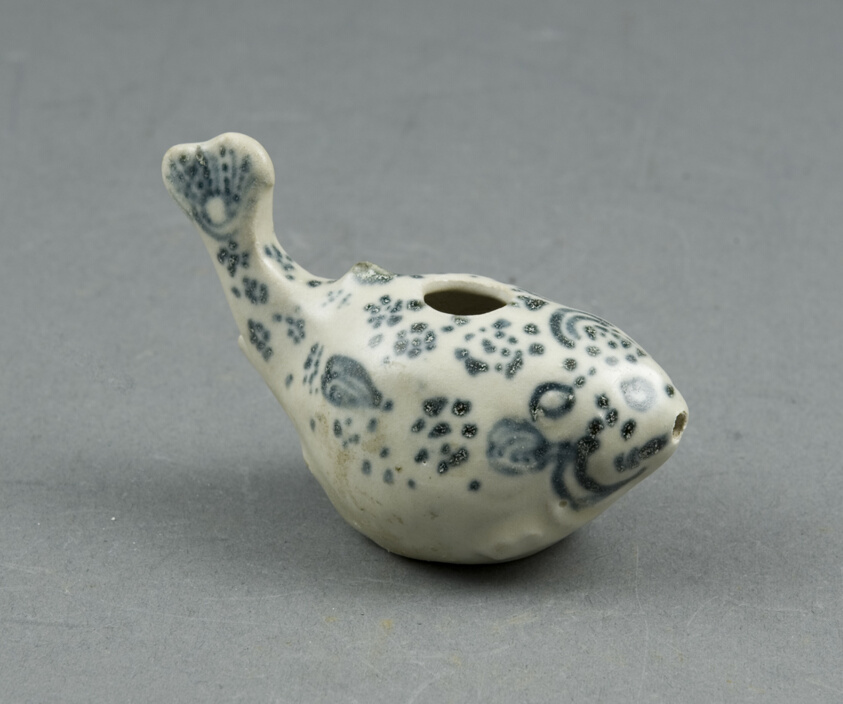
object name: Vessel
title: Miniature Water Dropper in the Shape of a Blowfish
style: Southeast Asian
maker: Vietnam; near Hoi An (offshore)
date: Late 15th/early 16th century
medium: Glazed stoneware with cobalt-blue underglaze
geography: Vietnam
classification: decorative arts; vessel